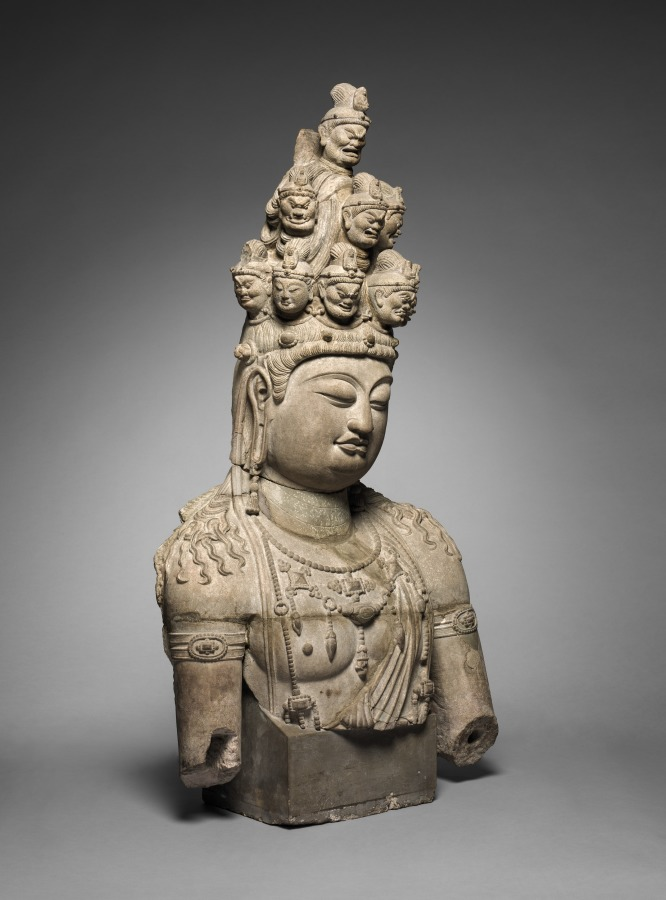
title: Eleven-Headed Guanyin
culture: China, Tang dynasty (618-907)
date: early 700s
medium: gray sandstone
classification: Sculpture